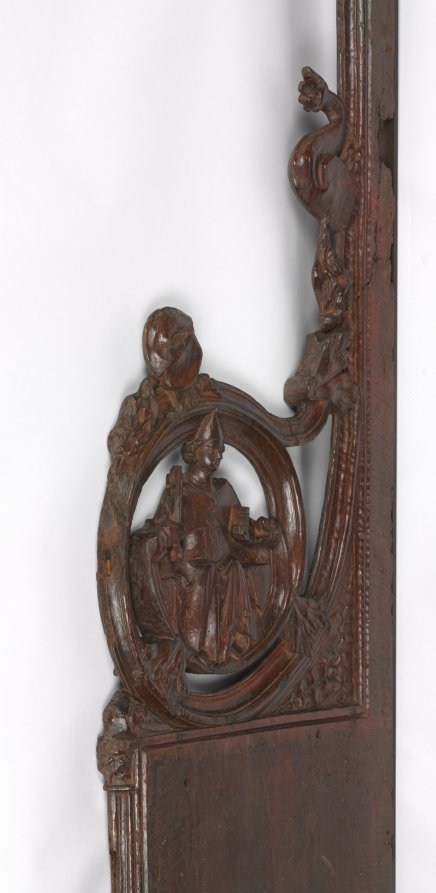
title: Panel from a Choir Stall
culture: Spain, Catalonia, Monastery of Pedralbes, 14th century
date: c. 1330–1340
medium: walnut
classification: Furniture and woodwork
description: The large panel shown here was probably the end panel of a stall that faced another across the choir of a Gothic church. The panel depicts a seated pope, possibly Urban IV, who holds the keys of St. Peter and a book.